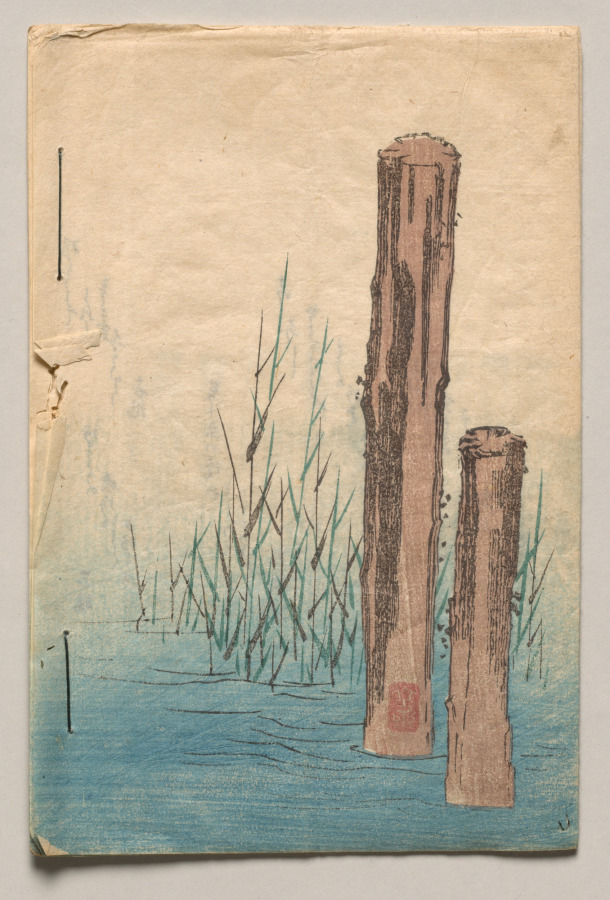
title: Back cover from Verses for Winter and Spring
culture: Japan, Edo period (1615–1868)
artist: Utagawa Hiroshige (Japanese, 1797–1858)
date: 1850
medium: Woodblock printed book; ink and color on paper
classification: Bound Volume